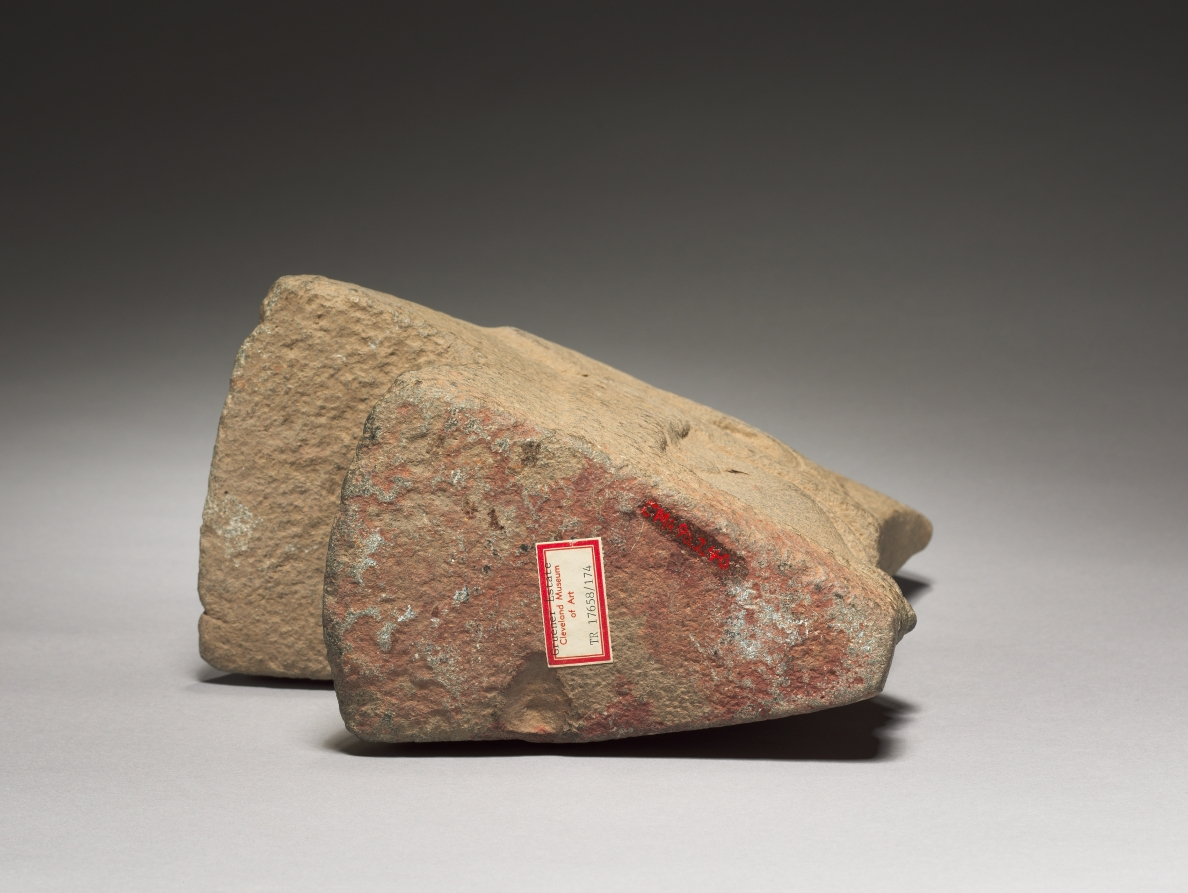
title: Hacha with Human Face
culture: Mexico, Veracruz, San Andres Tuxtla, late Classic period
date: 600–1000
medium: gray volcanic stone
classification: Sculpture